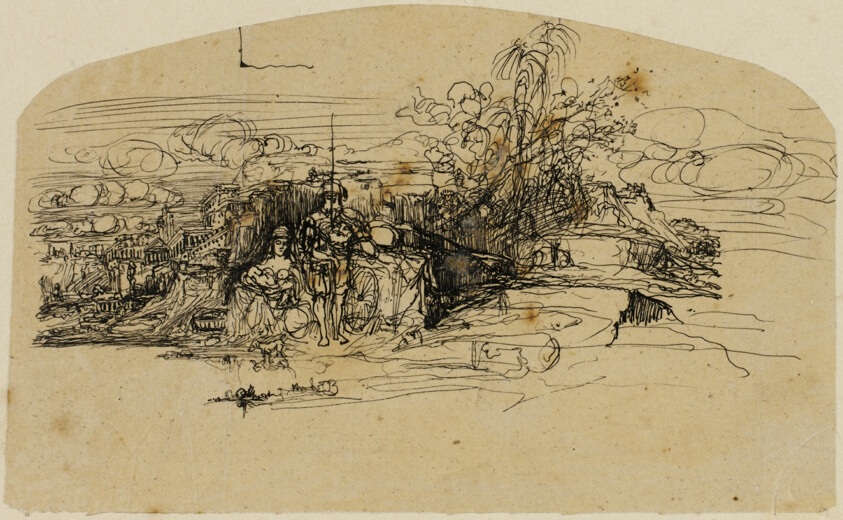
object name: Drawing and Watercolor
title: Rest with the Guard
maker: Rodolphe Bresdin (French, 1825-1885)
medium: Pen and black ink, on tan tracing paper, laid down on buff wove paper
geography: France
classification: pen and ink drawings; drawings (visual works); prints and drawing